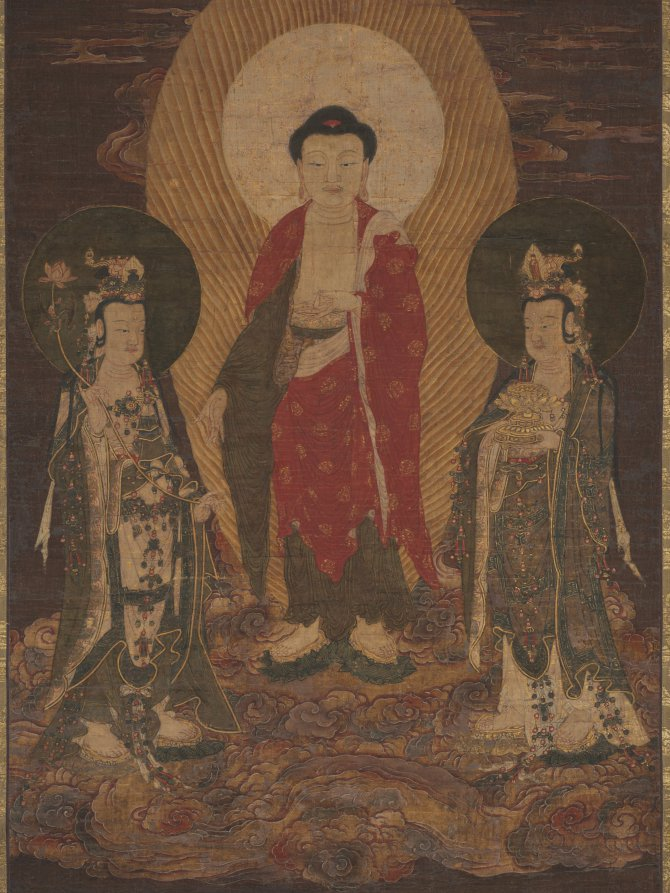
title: Amitābha Triad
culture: China, Ming dynasty (1368–1644)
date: possibly 1400s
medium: Hanging scroll; ink and color on silk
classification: Painting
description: This hanging scroll illustrates an apparition of Buddha Amitābha (阿彌陀 in Chinese) and two attendant bodhisattvas, in the midst of colorful light and swirling clouds. The one who carries a miniature image of Amitābha in its jeweled crown is Avalokiteśvara (觀音 in Chinese); the other who carries a flower vase is Mahāsthāmaprāpta (大勢至 in Chinese). Previously, this work was identified as a rare example of a Korean Buddhist painting from the early Joseon period. In contrast to surviving Korean works from this time the scroll stands out for its fine details. However, other elements such as the striped almond-shaped halo that encircles the main Buddha, firm red lines that define each deity’s facial features, and the flowing garments may identify it as an early Ming period Chinese Buddhist painting.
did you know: Amita is flanked by a pair of bodhisattvas, compassionate beings who aid others to reach enlightenment.